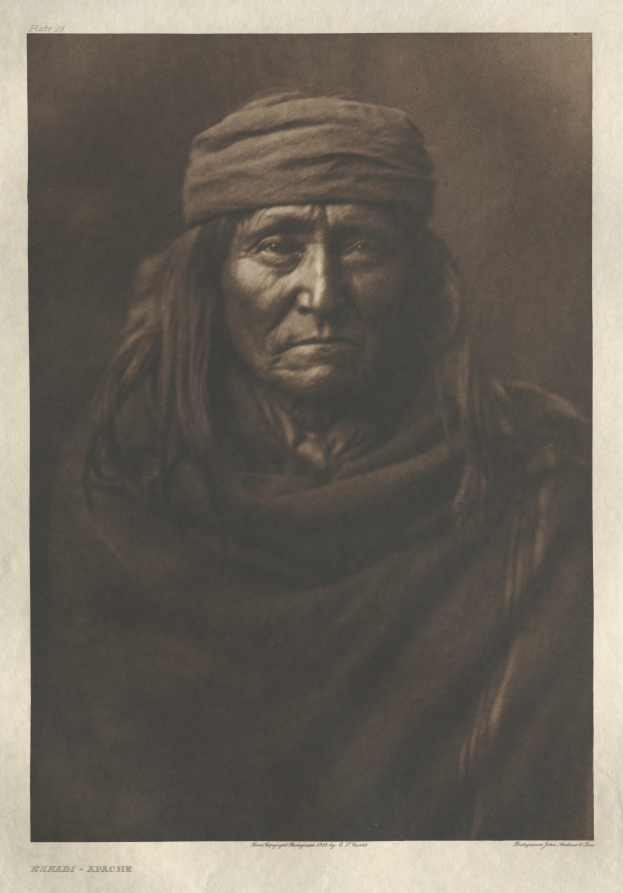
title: Portfolio I, Plate 16: Eskadi-Apache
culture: America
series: The North American Indian: being a series of Portfolios picturing and describing the Indians of the United States, the Dominion of Canada, and Alaska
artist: Edward S. Curtis (American, 1868–1952)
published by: The University Press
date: 1903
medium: photogravure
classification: Portfolio